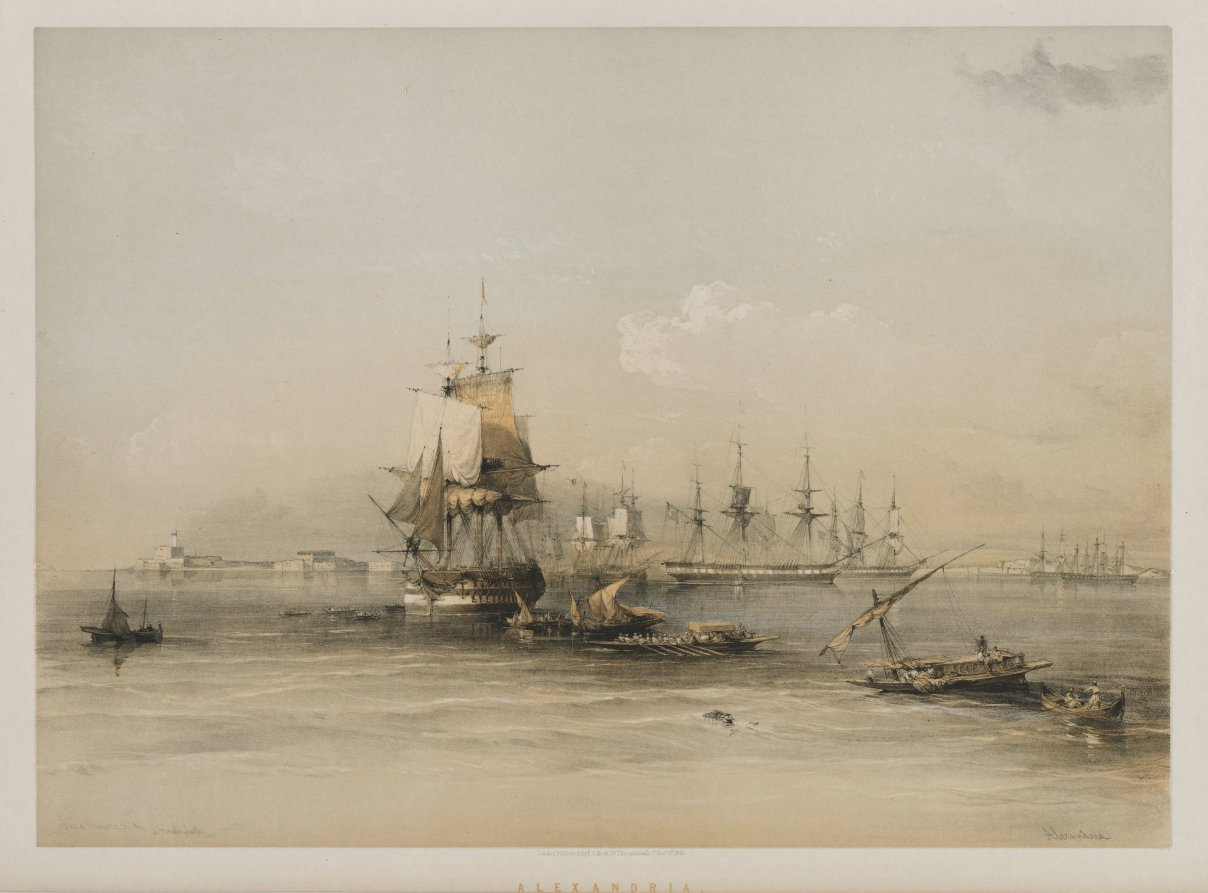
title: Egypt and Nubia, Volume III: Alexandria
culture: England, 19th century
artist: Louis Haghe (British, 1806–1885)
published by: F. G. Moon, 20 Threadneedle Street, London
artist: after David Roberts (Scottish, 1796–1864)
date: 1848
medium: color lithograph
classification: Print